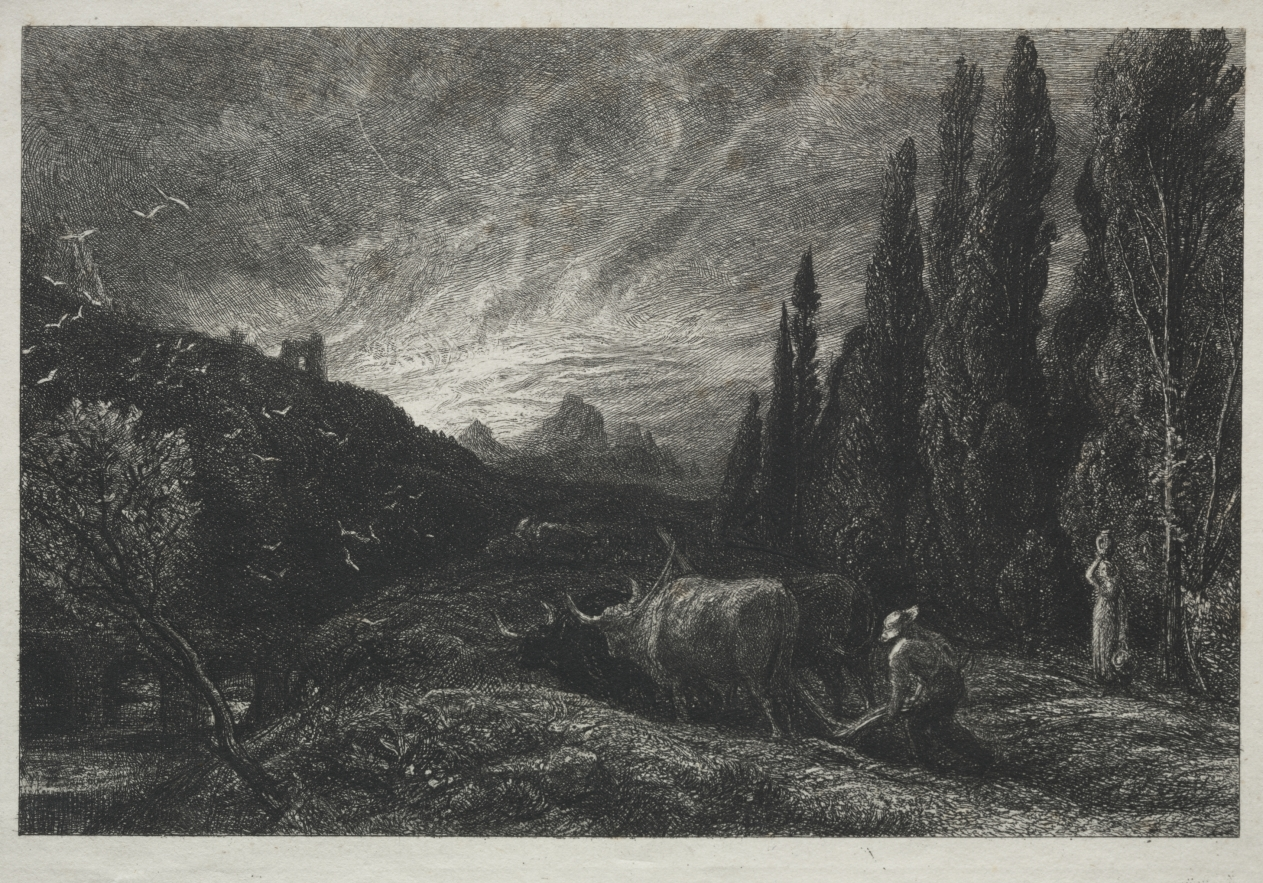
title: The Early Plowman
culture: England, 19th century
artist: Samuel Palmer (British, 1805–1881)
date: c. 1861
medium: etching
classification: Print